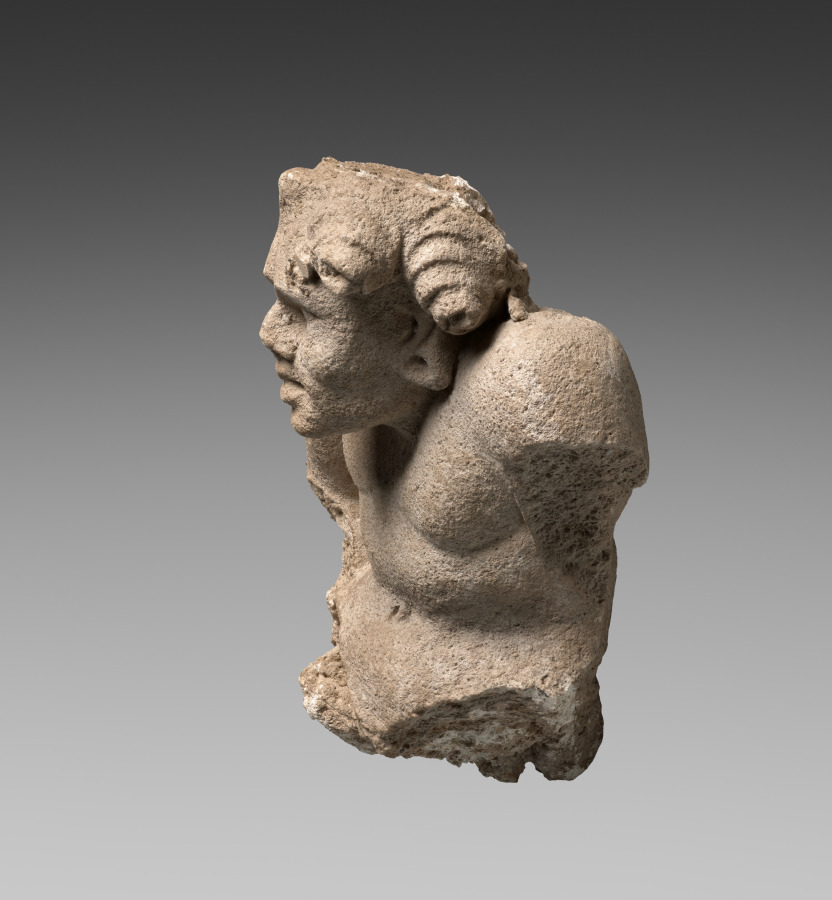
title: Male Atlantean figure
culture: Afghanistan, Hadda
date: c. 300 CE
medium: stucco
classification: Sculpture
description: The musculature, thick curly locks of hair, and deeply inset eyes of this fragmentary figure show the sculptor's incorporation of Greco-Roman forms. His hunched posture suggests that he supported a heavy weight, such as the dome of a stupa on his back. Rows of figures would have visually supported the stupa, in which relics of the Buddha or other revered Buddhist leader were interred.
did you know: Most sculptures from Hadda are preserved in museums, since the site was razed in 2001.